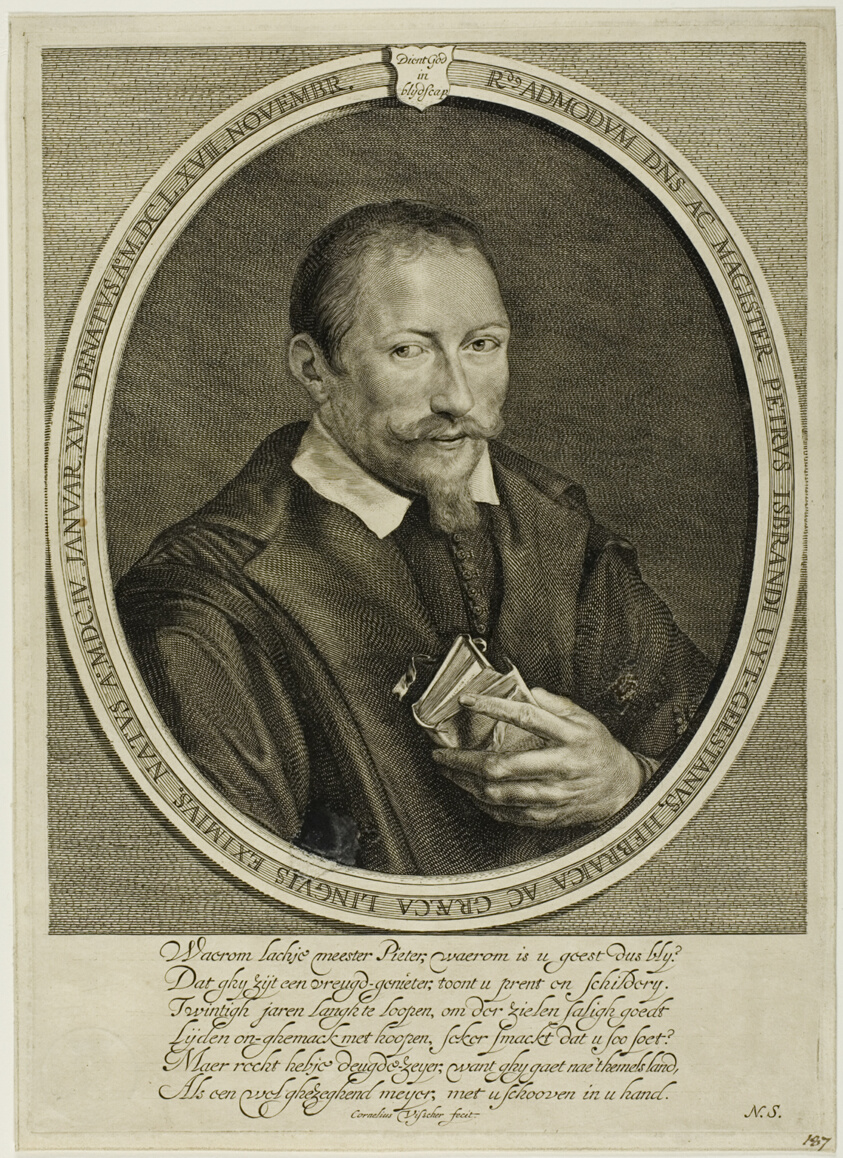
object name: Print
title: Peter Isbrandi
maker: Cornelis Visscher (Dutch, c. 1629-1658)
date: c. 1649-58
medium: Engraving on ivory paper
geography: Holland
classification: print; prints and drawing